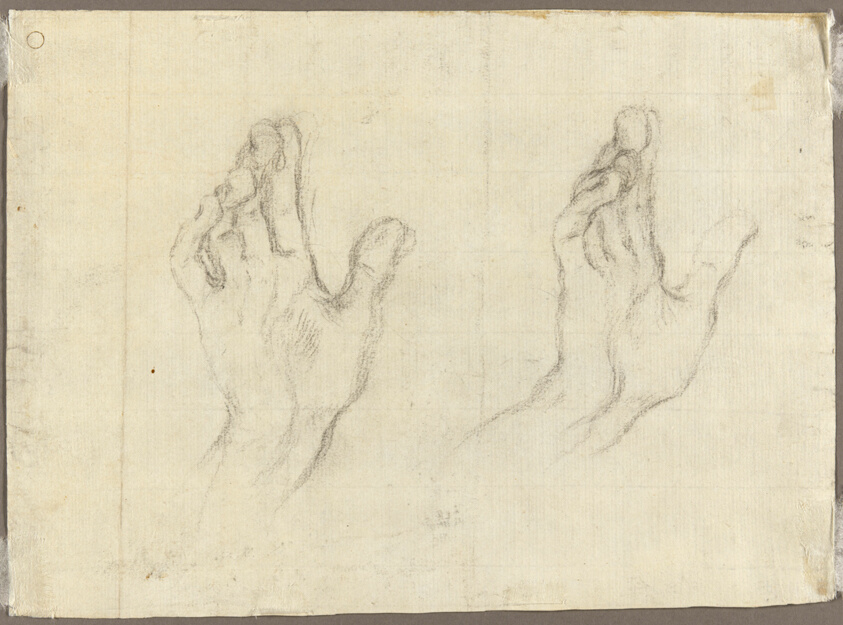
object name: Drawing and Watercolor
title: Putti Carrying the Cross (recto); Studies of a Hand (verso)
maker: Gian Lorenzo Bernini (Italian, 1598-1680)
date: 1672/75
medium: Charcoal and black chalk, with stumping (recto); black chalk (verso) on ivory laid paper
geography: Italy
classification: chalk; drawings (visual works); prints and drawing